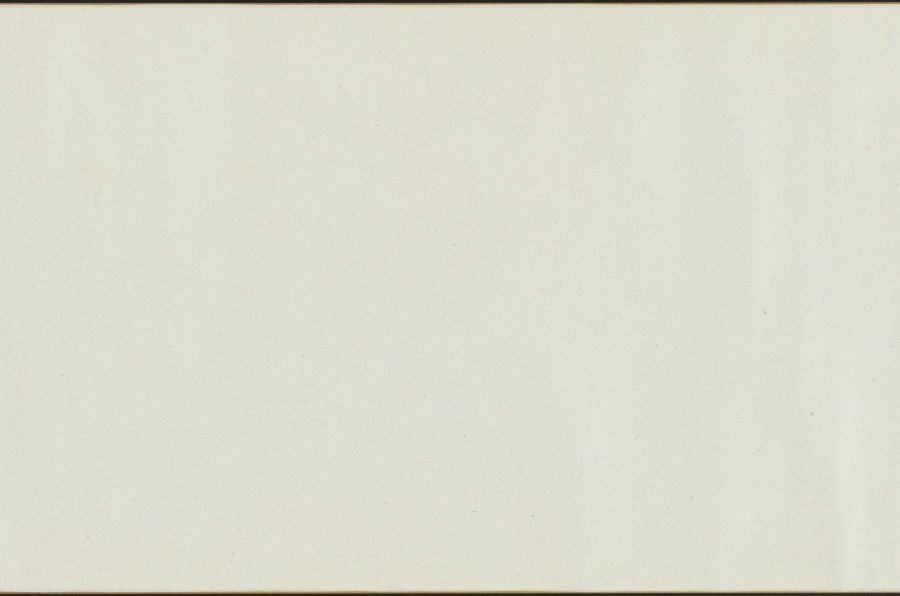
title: Scholar-Hermits in the Autumn Mountains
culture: China, Ming dynasty (1368–1644)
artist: Tang Yin (Chinese, 1470–1523)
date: 1500–1510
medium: handscroll, ink and light color on silk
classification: Painting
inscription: Artist's signature and 2 seals at end of scroll: Tang Yin [seals] T'ang Po-hu; T'ang Tzu'wei t'u-shu.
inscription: Title on frontispiece by Li Cho-kung (dates unknown).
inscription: 1 colophon and 11 additional seals: 1 colophon dated 1915 of Wu Tso-hsi (19th-20th c.); 2 seals of Gao Qifeng 高奇峰 (1889–1933); 5 seals of C. C. Wang 王季遷 (1907–2003); 4 seals unidentified.